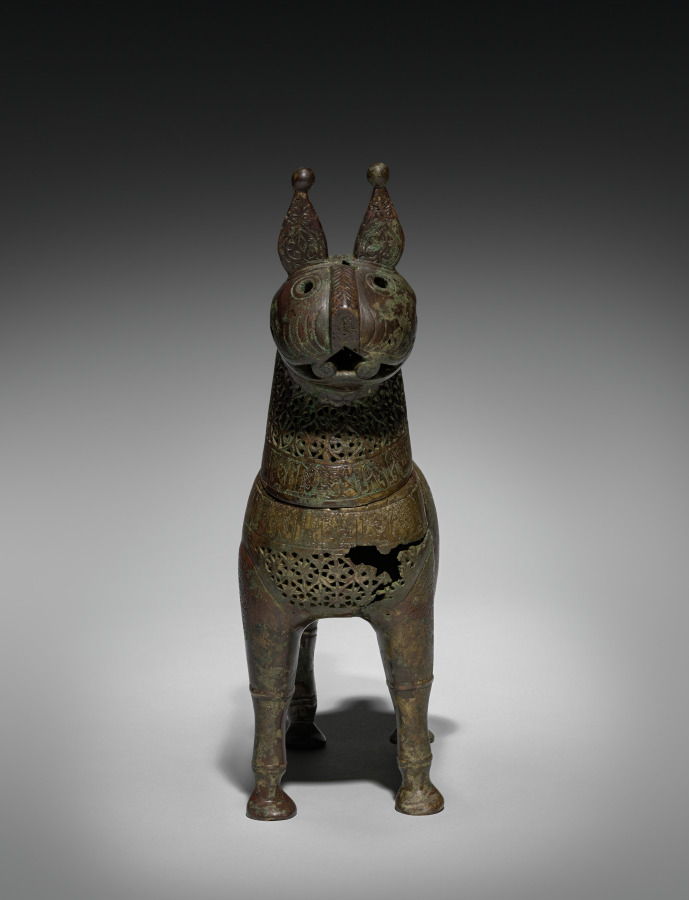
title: Feline Incense Burner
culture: Iran, Khurasan, Seljuq period of Iran (1037–1194)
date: 1150–1200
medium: Copper alloy, cast, engraved, chased, and pierced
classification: Metalwork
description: In Iran during the 1000s and 1100s, vessels in the shape of animals gained popularity, especially as incense burners. Felines were favored in Persian art and this piece may represent a caracal, a type of lynx. The head of the creature was cast separately and is removable to fill its body with hot coals and incense. Qur’anic verses on the neck and spine remind worshippers to set work aside, attend prayer, and then disperse to seek God’s bounty. The diffusion of perfumed smoke through the burner’s pierced palmette design may have served as a sensorial reminder of this teaching.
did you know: Arabic inscriptions in Kufic script against a background of scrolling arabesques run along the back and neck of the feline form.